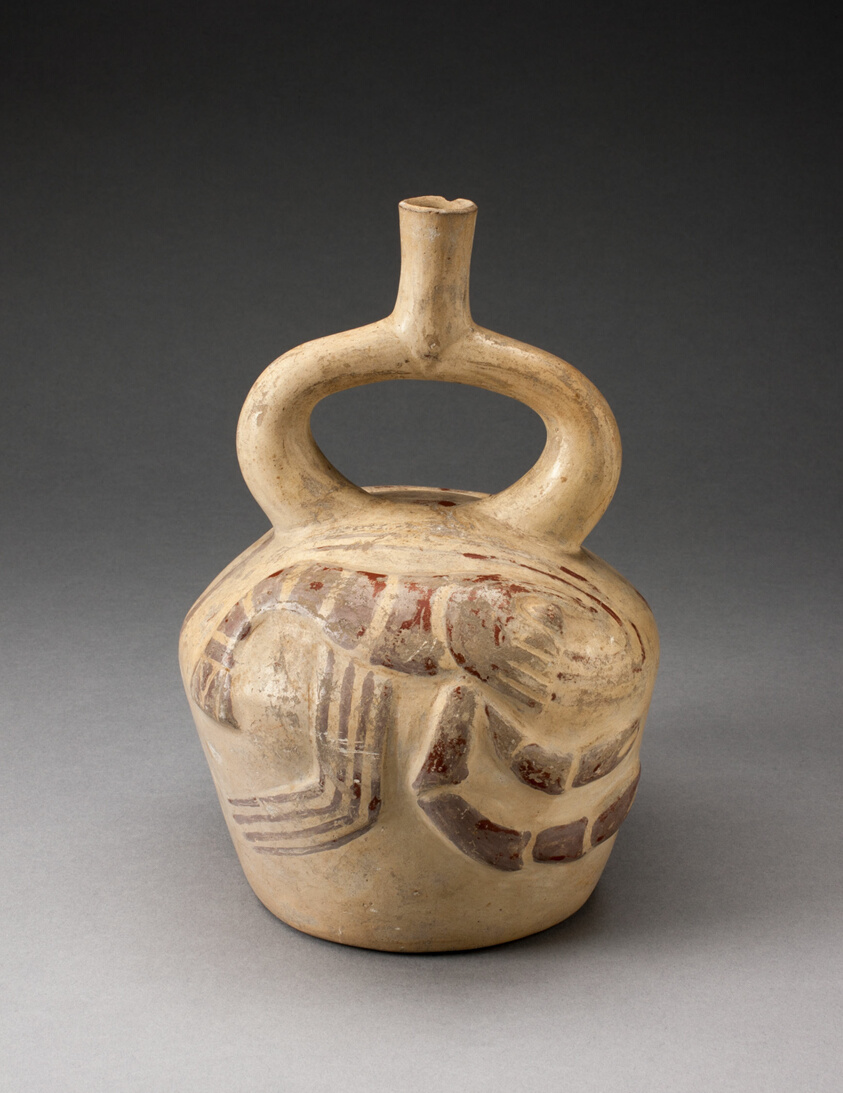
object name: Vessel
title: Stirrup Spout Vessel with Raised Lobster Motifs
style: moche, Arts of the Americas, andes, south american, andean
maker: Moche (North coast, Peru)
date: 100 BCE–500 CE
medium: Ceramic and pigment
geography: Peruvian North Coast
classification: earthenware; ceramics; vessel; art of the americas